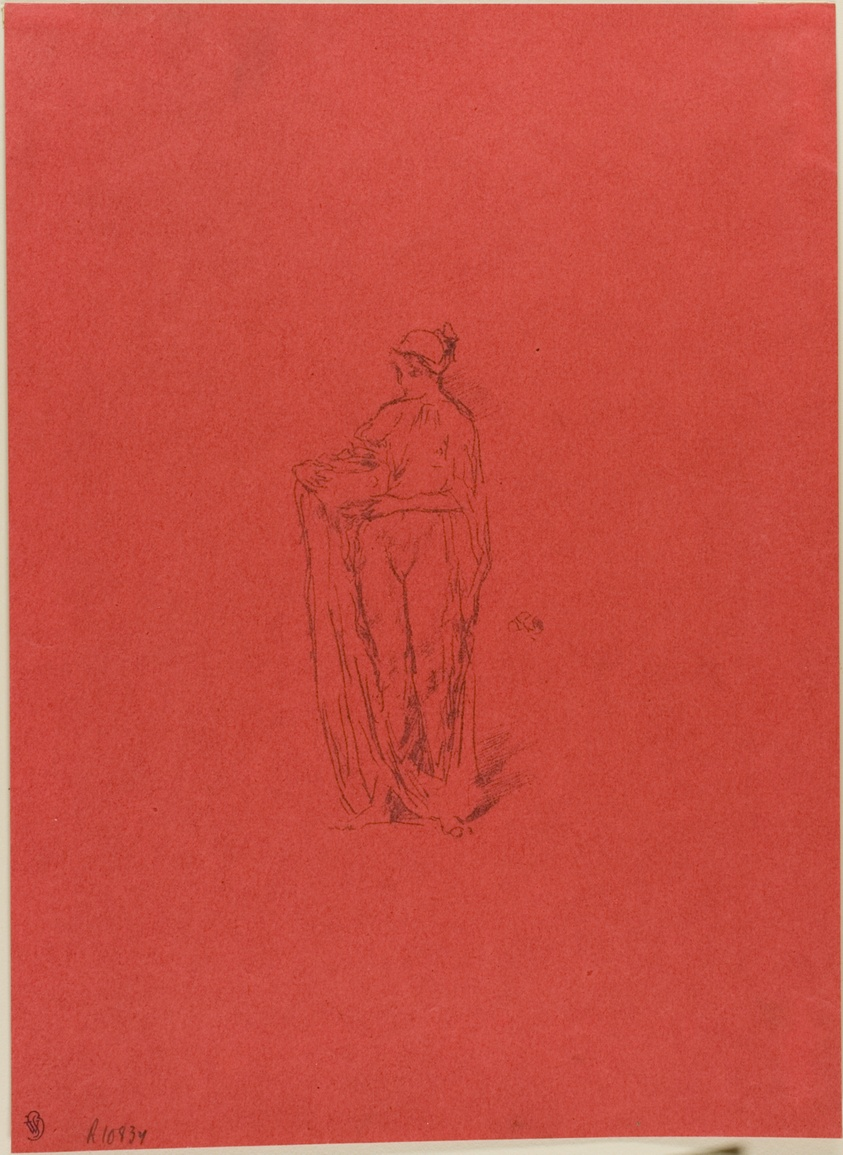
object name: Print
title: Girl with Bowl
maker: James McNeill Whistler (American, 1834-1903)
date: 1895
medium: Transfer lithograph in gray on red wove Japanese vellum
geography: United States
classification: transfer lithograph; lithograph; print; prints and drawing